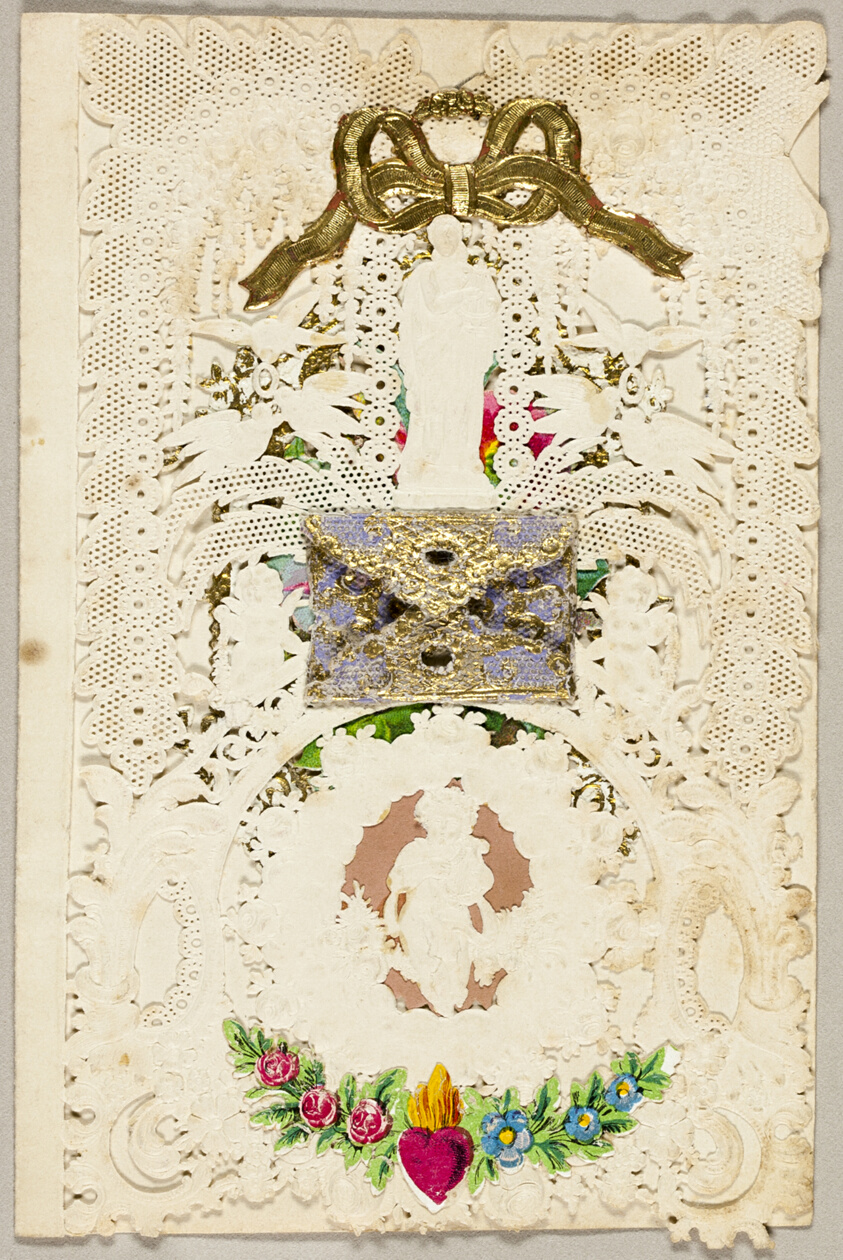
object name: Drawing and Watercolor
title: Untitled Valentine (Antique Figures and Birds)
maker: John Windsor (English, 19th century)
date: c. 1860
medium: Collaged elements on cut and embossed (designed) ivory wove paper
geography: England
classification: collage; valentine; prints and drawing; paper